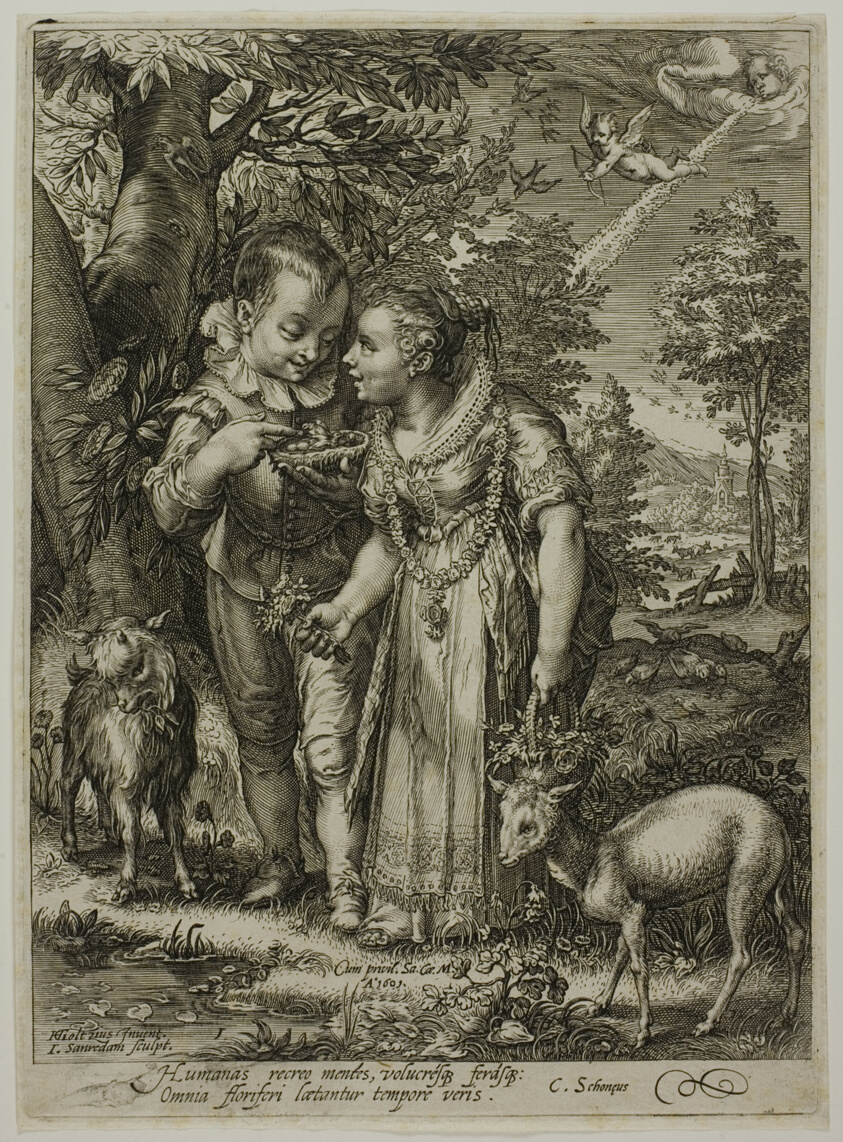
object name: Print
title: Spring, from The Four Seasons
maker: Jan Saenredam (Dutch, 1565-1607)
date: 1601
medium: Engraving on cream laid paper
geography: Netherlands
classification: engraving; print; prints and drawing